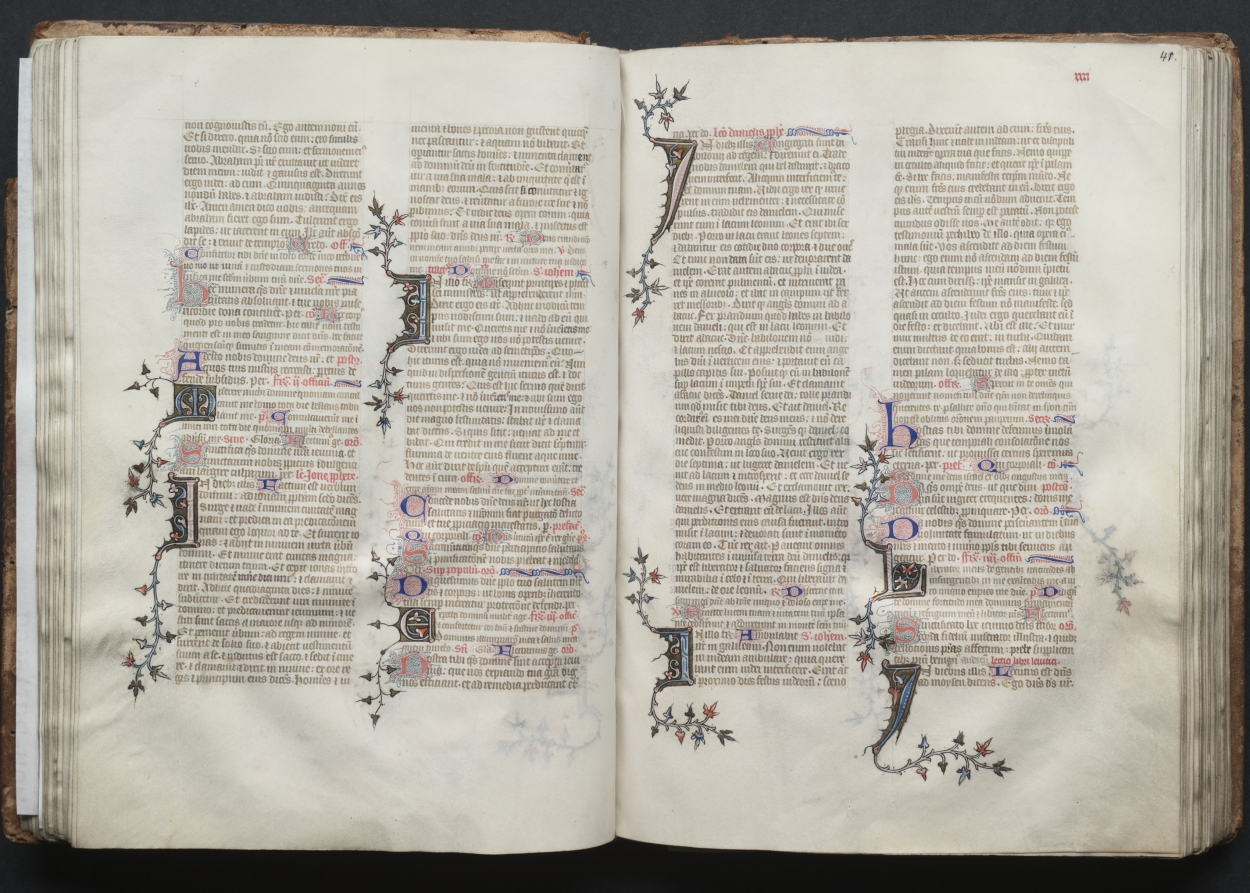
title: The Gotha Missal: Fol. 40v, Text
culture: France, Paris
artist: Master of the Boqueteaux (French)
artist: and Workshop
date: c. 1375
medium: ink, tempera, and gold on vellum; blind-tooled leather binding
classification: Bound Volume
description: The style and quality of this manuscript's decoration is typical of deluxe Parisian books made for aristocratic or royal patrons. Most of the book's decoration appears to be the work of the Master of the Boqueteaux, an artist active at the court of King Charles V (died 1380). His style was apparently shared by a number of book illuminators working in and around Paris. It is very possible that the Gotha Missal belonged to Charles V, but is not provable because the manuscript has no royal portraits and lacks a colophon. Given the book's magnificent decoration, however, it would seem that it was produced for a Valois prince, if not for the king himself. The manuscript receives its name from the German dukes of Gotha, its later owners.